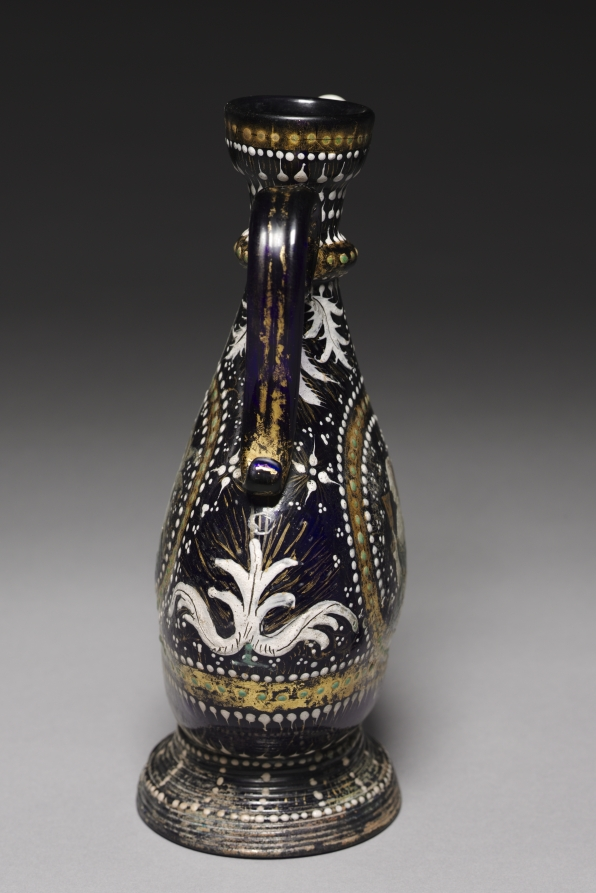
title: Ewer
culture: Italy, Venice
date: c. 1480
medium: enameled lapis-blue glass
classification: Glass